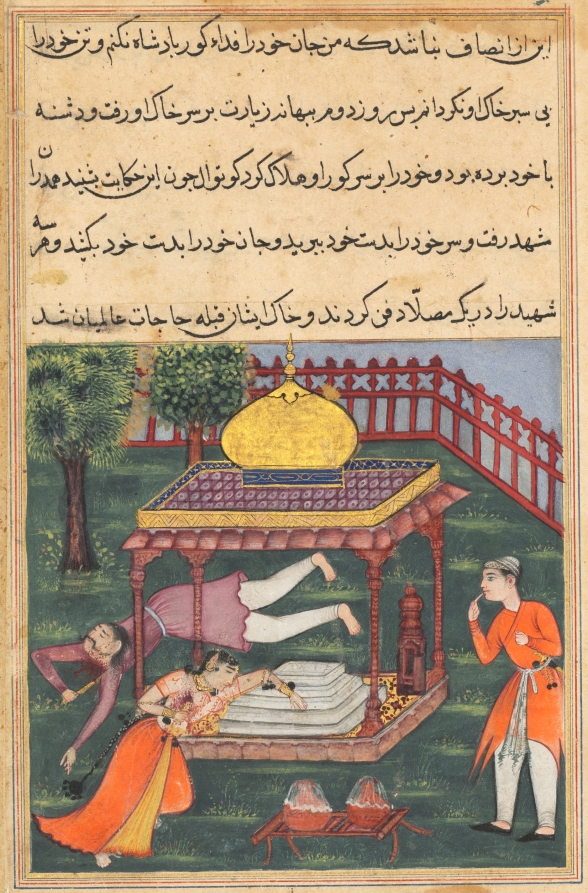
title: Mahrusa kills herself at the tomb of the king of Zabul, and her husband does likewise, from a Tuti-nama (Tales of a Parrot): Thirty-sixth Night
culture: Mughal India, court of Akbar (reigned 1556–1605)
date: c. 1560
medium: gum tempera, ink, and gold on paper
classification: Painting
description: Mahrusa lies slumped across the king’s tomb with a gold knife imbedded in her chest. She has committed suicide as penance for the king’s death. Mahrusa’s husband lies dead at her side, bloody knife in hand. On the right, a man watches the gruesome scene in shock. Following their deaths, Mahrusa, her husband, and the king become revered as martyrs.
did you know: Mahrusa is married to the prefect of the city.